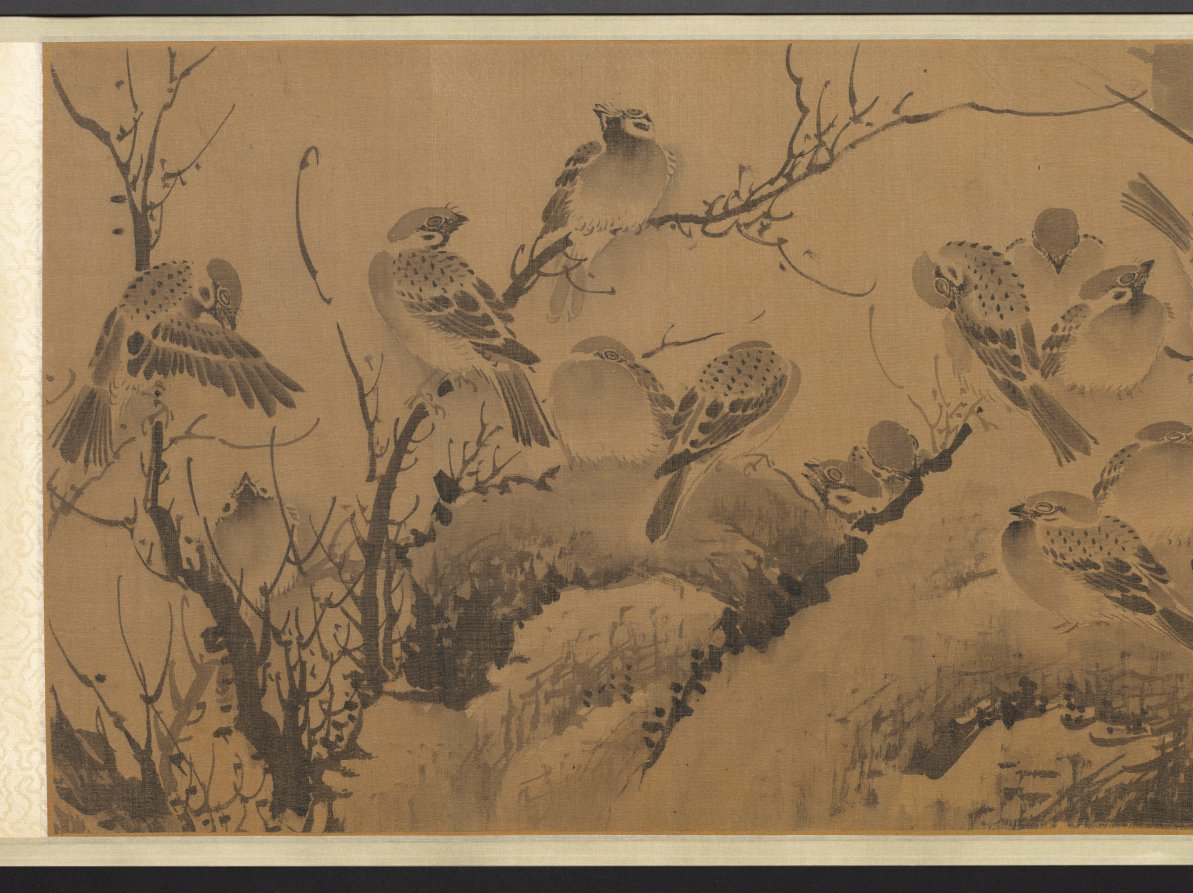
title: A Hundred Sparrows in a Lofty Grove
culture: China, Ming dynasty (1368–1644)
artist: attributed to Lin Liang (Chinese, 1416–1480)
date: 1368–1644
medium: handscroll; ink on silk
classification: Painting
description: Sparrows engaged in all kinds of activities frolic amid leafy branches, blades of grass, rocks, and a waterfall. As our eyes move over the scroll, the artist engages us in enjoying the sparrows’ carefree movements in a natural setting. The charming birds were painted from close observation in swift and fluent brushstrokes. Sparrows are a common bird and in Chinese painting they often represent the commoner in human society as opposed to the noble pheasant or peacock representative of the ruling class.